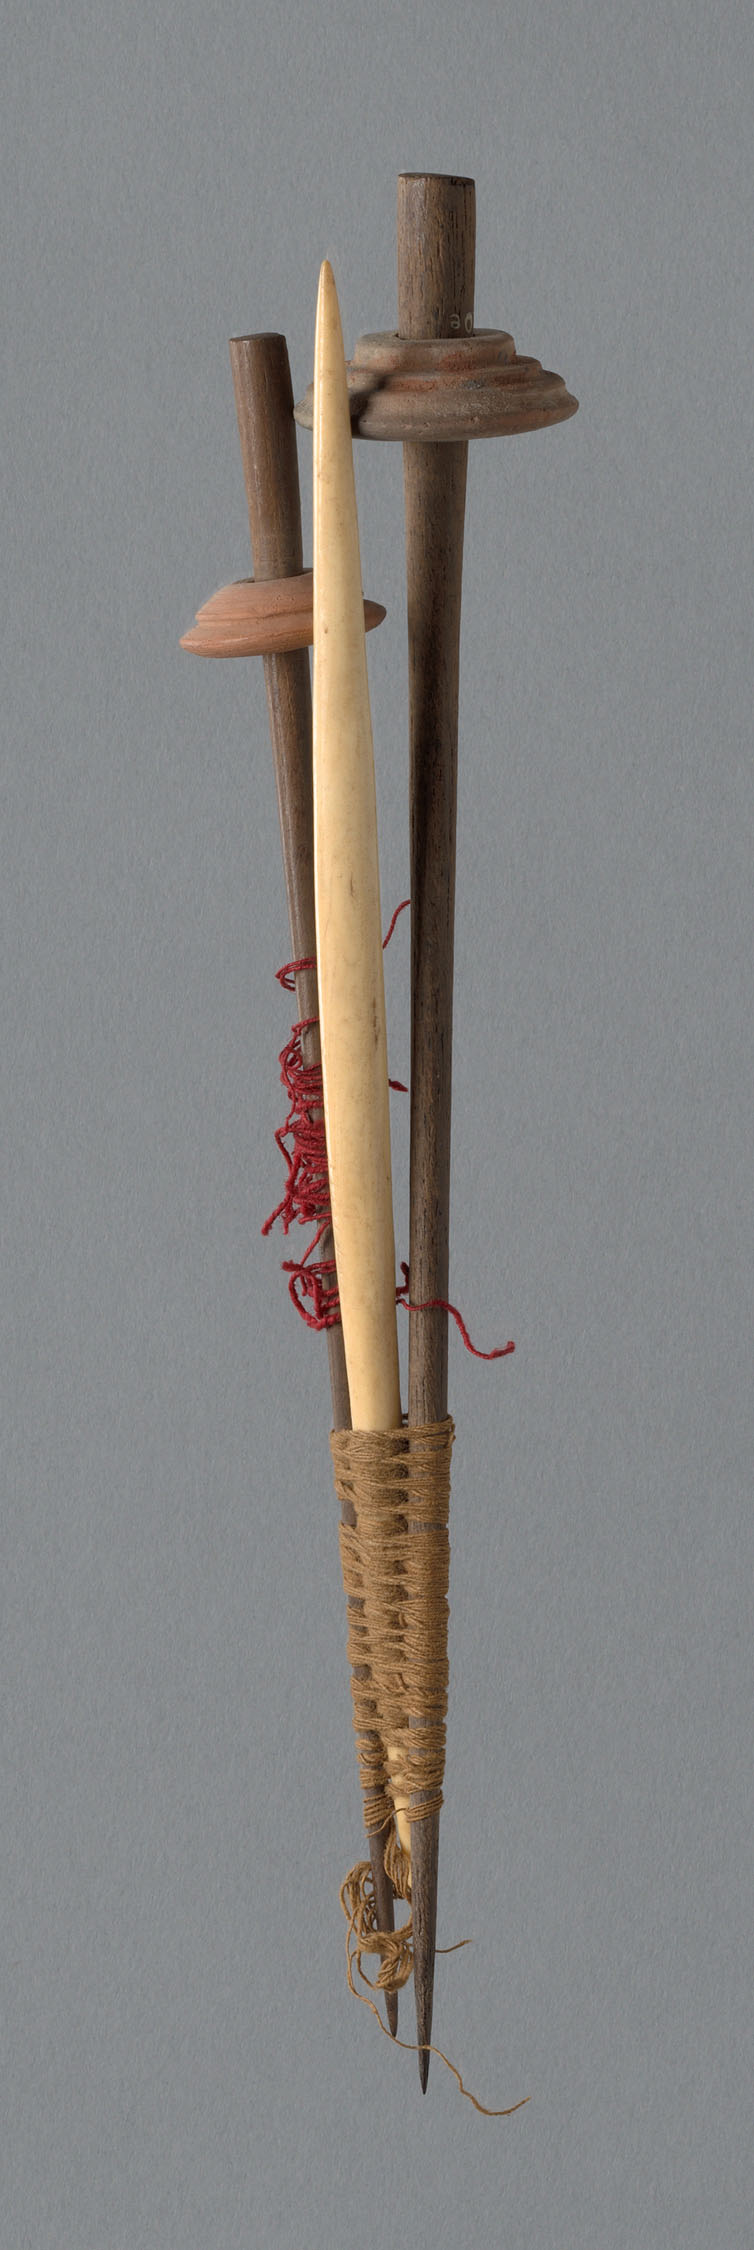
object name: non-art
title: Wooden Spindle with Ceramic Whorl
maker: Peru, Possibly central coast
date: 1000/1476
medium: Wood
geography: Peru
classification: spindles (textile working equipment); textile working equipment; accessories (object genre); textile